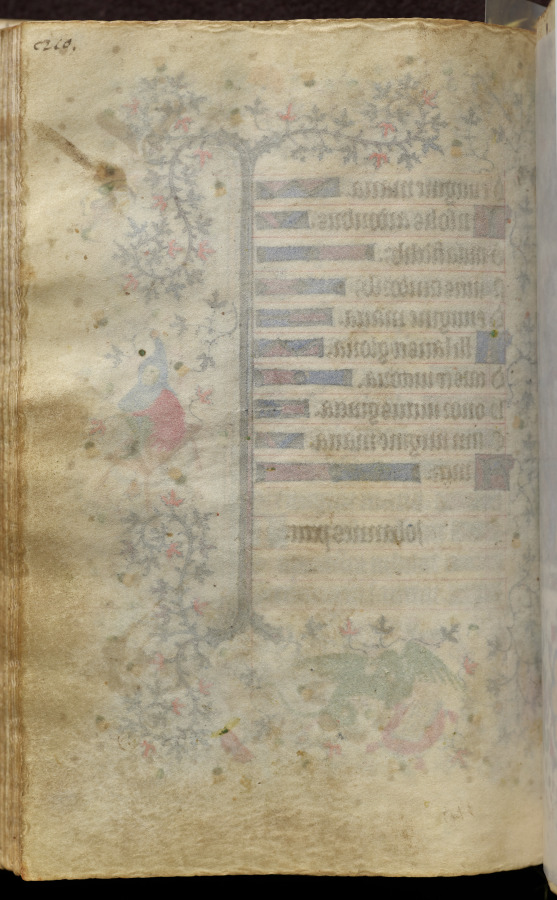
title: Hours of Charles the Noble, King of Navarre (1361-1425): fol. 105v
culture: France, Paris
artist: Master of the Brussels Initials and Associates (French)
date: c. 1405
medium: ink, tempera, and gold on vellum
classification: Bound Volume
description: This precious volume was obviously highly prized by its owner, the French-born King of Navarre, who had his coat of arms painted on no less than twenty folios. Rather than directly commissioning this manuscript from a specific workshop, it seems that Charles the Noble acquired his book of hours -- perhaps ready-made for the luxury market -- while on a trip to Paris in 1404-05. A collaborative effort, six painting styles are evidenced within the pages of this codex, those of two Italians, two Frenchmen, and two Netherlanders. The painter who was responsible for the planning and decoration of the book, and who produced seventeen of the large miniatures, was a Bolognese artist known as the Master of the Brussels Initials. His principal assistant, responsible for most of the borders, was a Florentine who signed his name "Zecho" da Firenze on folio 208 verso.